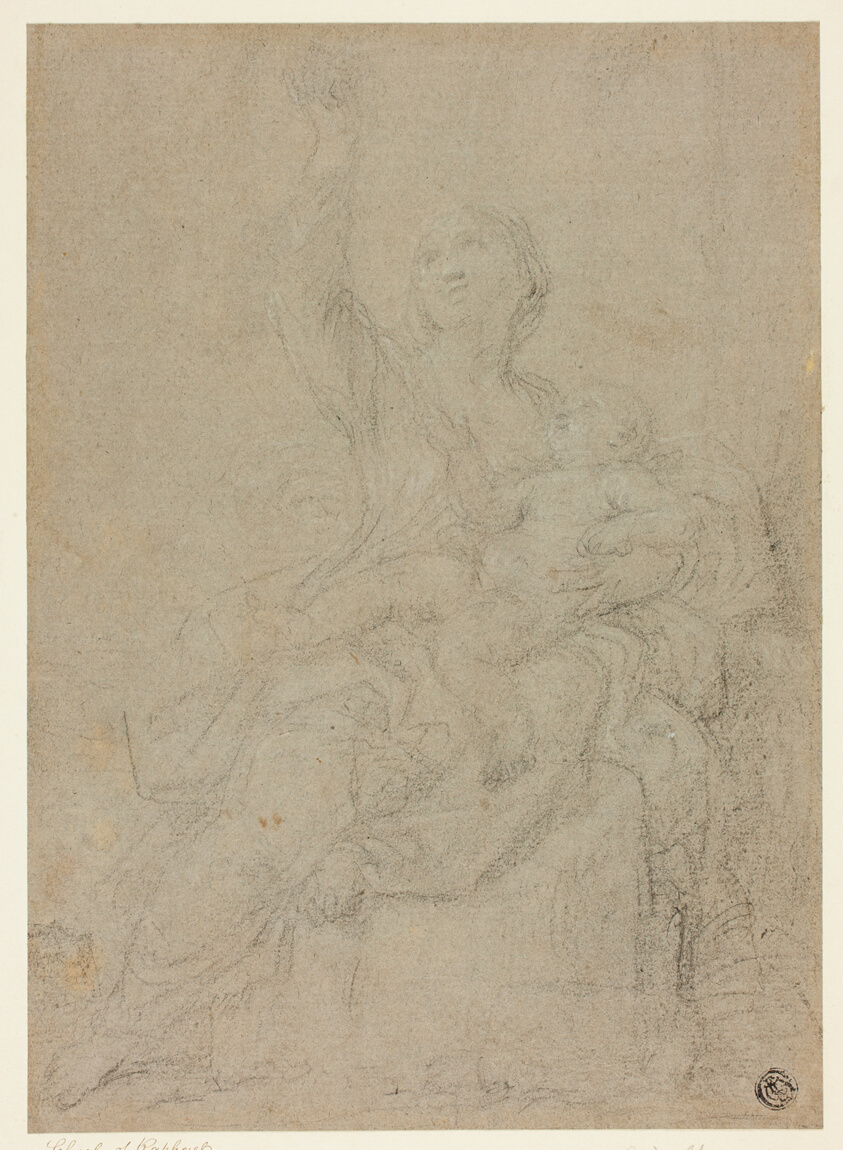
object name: Drawing and Watercolor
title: Seated Madonna and Child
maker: Possibly Ciro Ferri (Italian, 1634-1689); or a follower of Carlo Maratti (Italian, 1625-1713)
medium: Black chalk, heightened with touches of white chalk, on gray-brown laid paper, laid down on cream wove paper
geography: Italy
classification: charcoal; drawings (visual works); prints and drawing